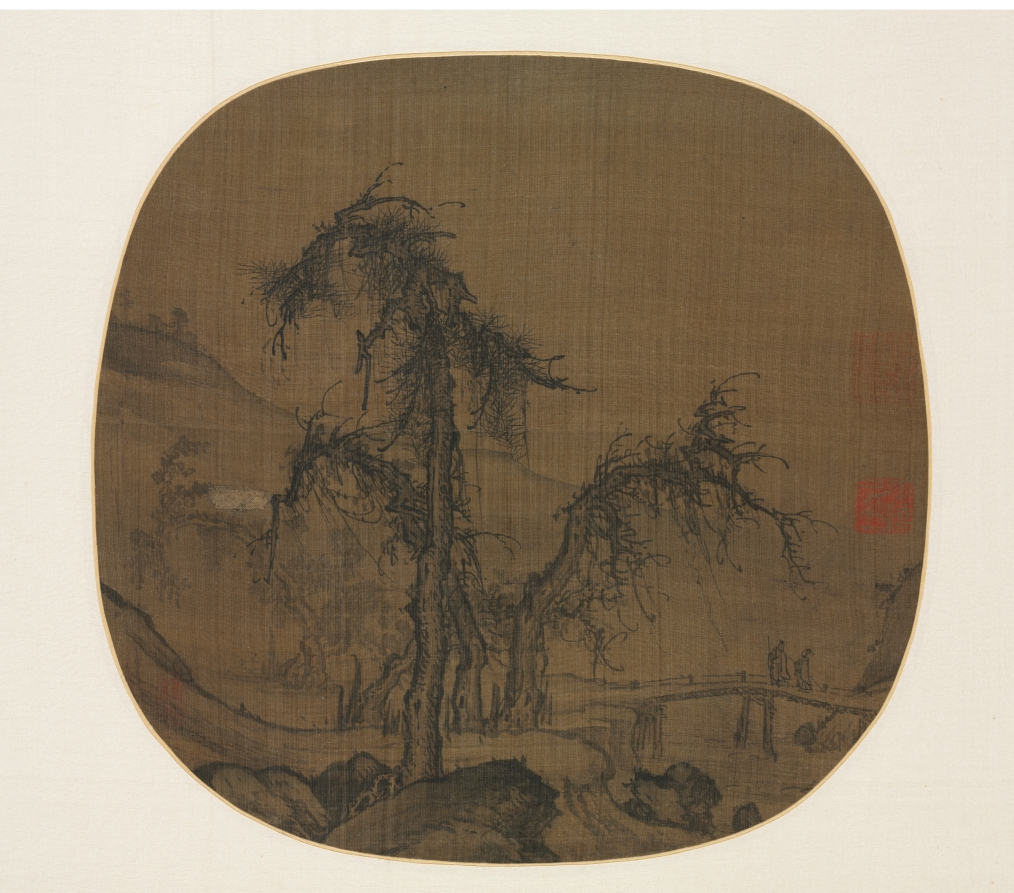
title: Ramblers over a Winding Stream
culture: China, Yuan dynasty (1271-1368)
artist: Luo Zhichuan (Chinese, active 1280s–1320s)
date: before 1330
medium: Album leaf; ink on silk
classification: Painting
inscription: Artist's seal: Zhichuan 稚川 (partially obliterated but readable). 2 additional seals: 1 of Duan Fang 端方 (1861–1911); 1 unidentified.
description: This album leaf is one of few surviving paintings by Luo Zichuan. During the Yuan dynasty, the Luo family of painters in Jiangxi province, in Southern China, had a network of patrons extending their reputation all the way to the capital city of Beijing. The small, rounded figures crossing the bridge on the right are gentlemen enjoying a ramble, rather than ascetics or travelers. The composition is dominated in the center foreground by “crab-claw” trees with knotty trunks and twisting branches. Their robust forms show Luo’s connection to the earlier master, Guo Xi (about 1020–about 1090).